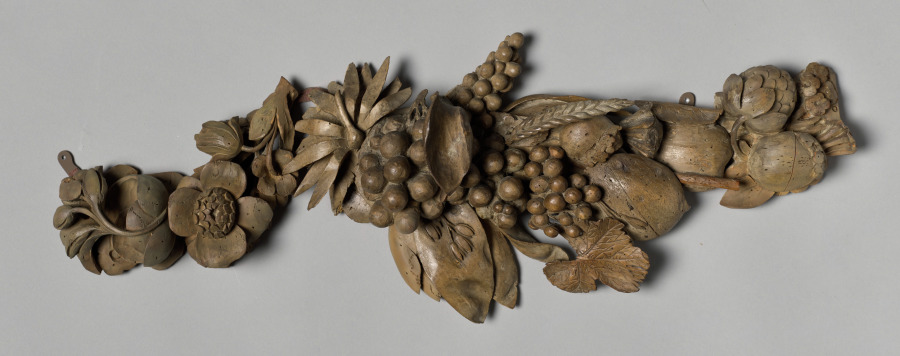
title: Carving from an Overmantel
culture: England, 17th century (Charles II)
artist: Grinling Gibbons (British, 1648–1721)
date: c. 1675–1677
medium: lindenwood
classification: Sculpture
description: See cover record.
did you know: The swags of fruit and foliage featured in this wooden overmantel decoration evoke the bounty of the English countryside.